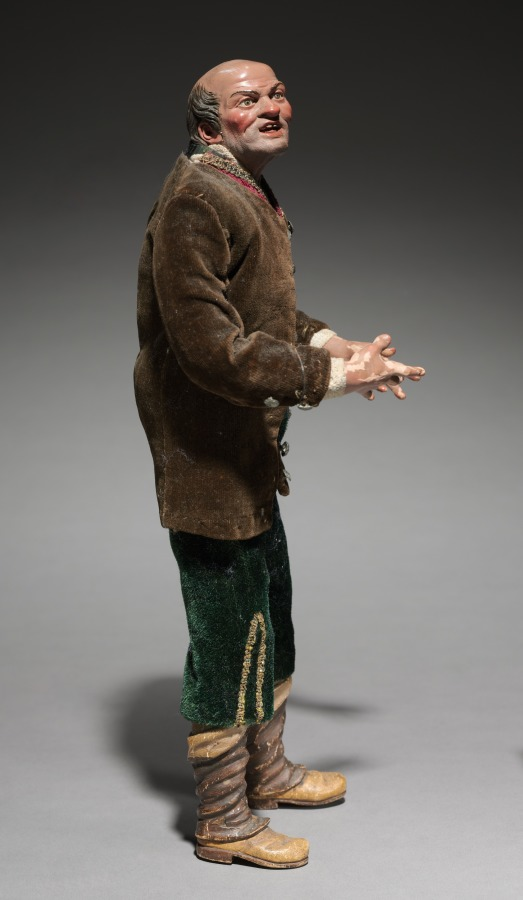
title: Figure from a Crèche: Standing Man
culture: Italy, Naples, late 18th-early 19th century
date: 1780–1830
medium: painted wood and terracotta with various textiles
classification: Sculpture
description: The practice of creating scenes of the Nativity for the home dates from the early 1700s in Italy, where people began to set up doll-like figures of about a foot or less in height. The custom was particularly popular in Naples around 1800, where crèche scenes (crèche means cradle, or crib) included many figures, whose heads and hands of painted terracotta, stuffed cloth bodies, and clothing adapted from contemporary local costumes gave them an amazingly realistic character. Representations of the birth of Jesus can be traced to the first few centuries of Christianity. Both living creatures and sculptural depictions of them were used from early times. By the late middle ages it was customary to create life-size figures of wood or stone, naturalistically painted, to represent the characters who participated in the events of Jesus's early life. These sculptures were then arranged in scenes illustrating one or both of the most important of these events, the Adoration of the Shepherds and the Adoration of the Magi-the three kings from the East who came to pay homage to the Christ child. Used in churches, these large figures were especially popular in Italy, Central Europe, Spain, and Portugal.